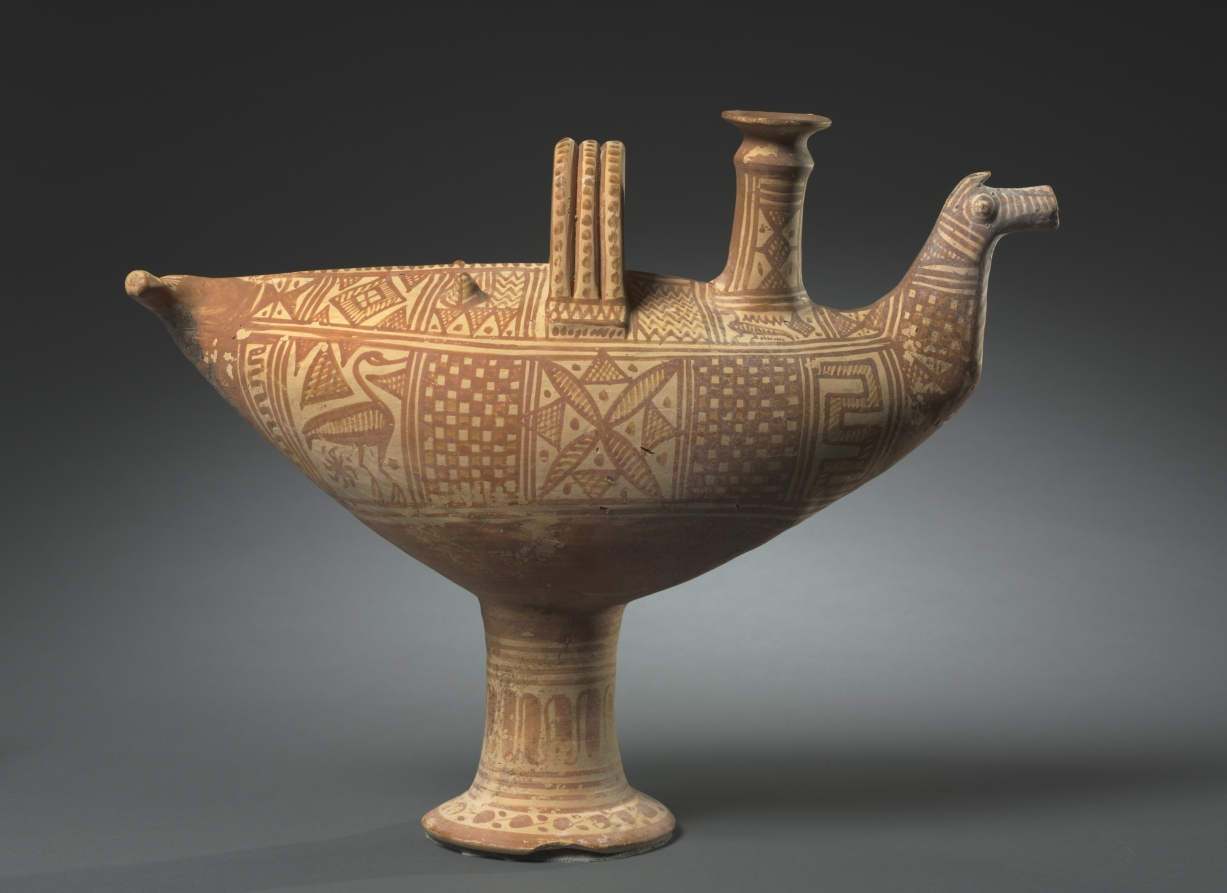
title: Italo-Geometric Bird Askos (Oil Vessel): Hunter (Herakles?) and Stag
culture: Etruscan, likely made at Vulci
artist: attributed to Bisenzio Class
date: c. 700 BCE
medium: ceramic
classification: Ceramic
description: This bird-shaped askos (oil vessel), with a tall filling spout and a pierced beak for pouring, perhaps held perfumed oil for a funerary function. Although the shape likely stems from Italian tradition, the abundantly painted geometric decoration, covering nearly every available surface, derives originally from Greece. Thus scholars have suggested that an immigrant Greek potter working in Etruria may have made the vessel. The sole narrative scene shows a man with a spear leading an antlered animal. If not an anonymous hunter, this could be the earliest known representation of the hero Herakles performing his third labor: capturing the golden-antlered Keryneian hind, or female deer.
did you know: This askos may feature the earliest known representation of Herakles's third labor, the Keryneian hind.